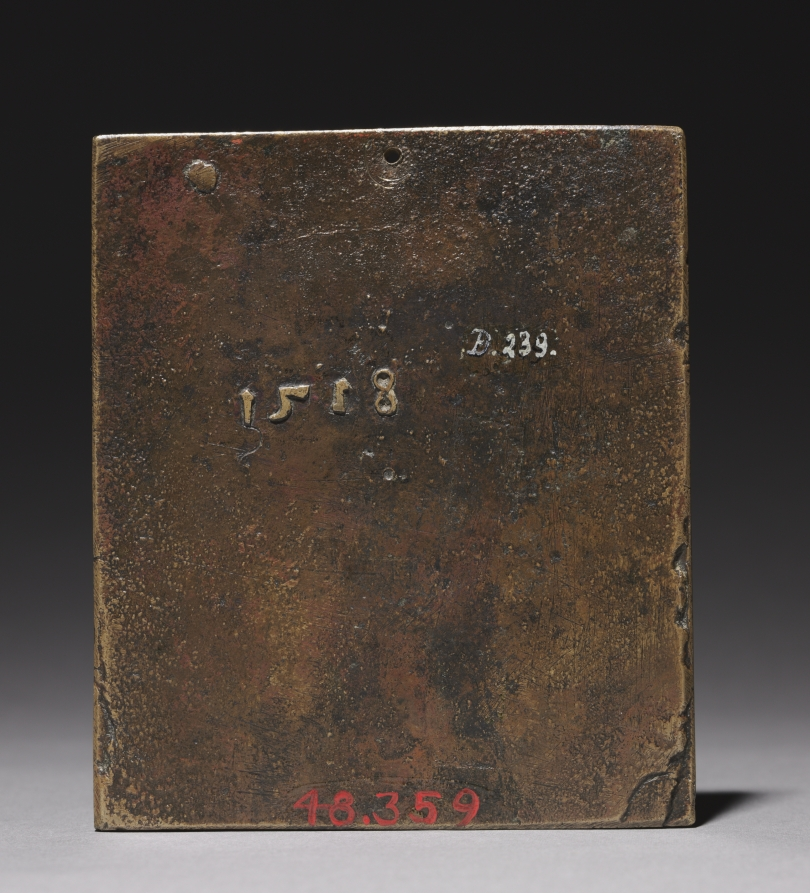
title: Adam and Eve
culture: Germany, Nuremberg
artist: Ludwig Krug (German, 1490–1532)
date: 1518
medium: bronze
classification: Sculpture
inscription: in relief on a plaque near lower edge: "L K" with a jug in between the letters; in relief on the tree trunk: "1515" (for the model); in relief on the reverse: "1518" (for this cast).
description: The present plaquette is the only signed and dated work in bronze by Ludwig Krug. The plaquette exists in two examples, the earlier of which was cast only with the date "1515" (the date of the model) on the obverse side. This slightly later plaquette bears the date "1515" on the front side, but also bears the actual casting date of "1518" on the reverse.